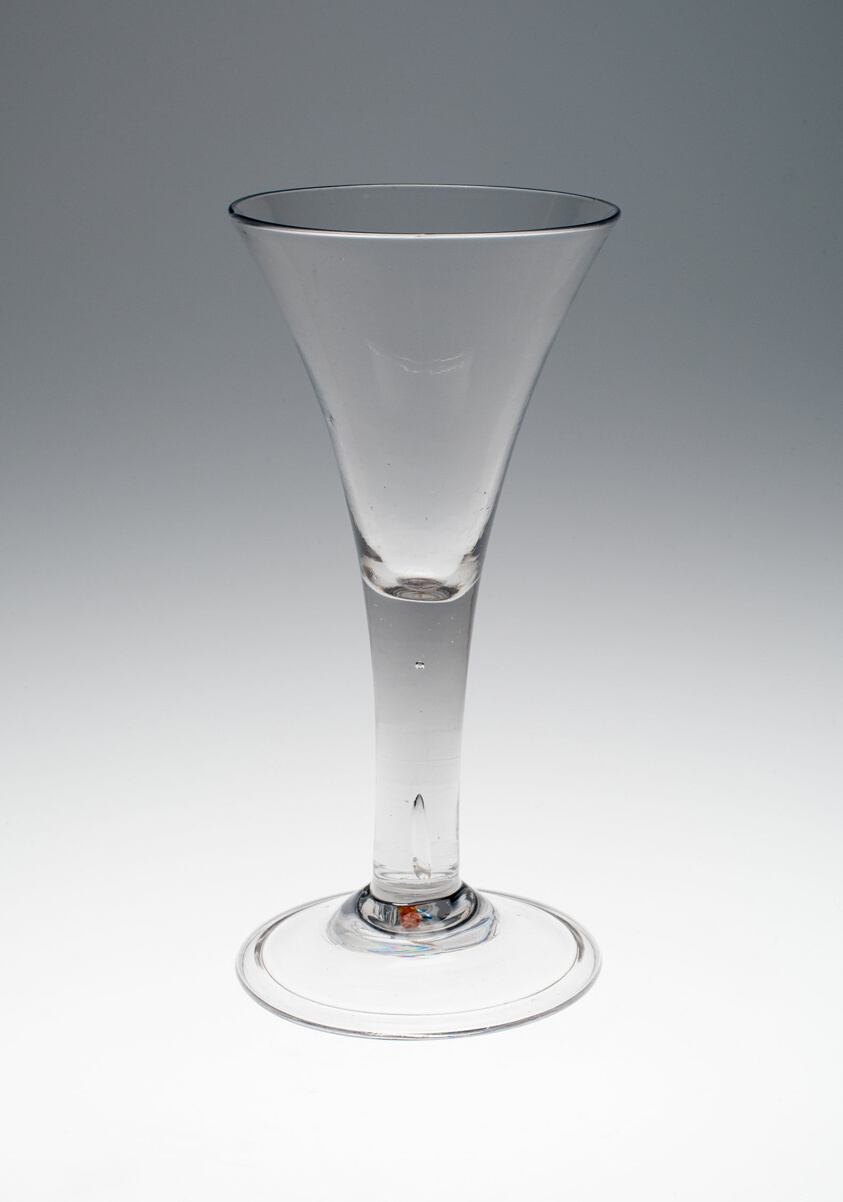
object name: Glass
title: Wine Glass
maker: England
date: c. 1730/50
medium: Glass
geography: England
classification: drinking vessel; glass; european decorative arts